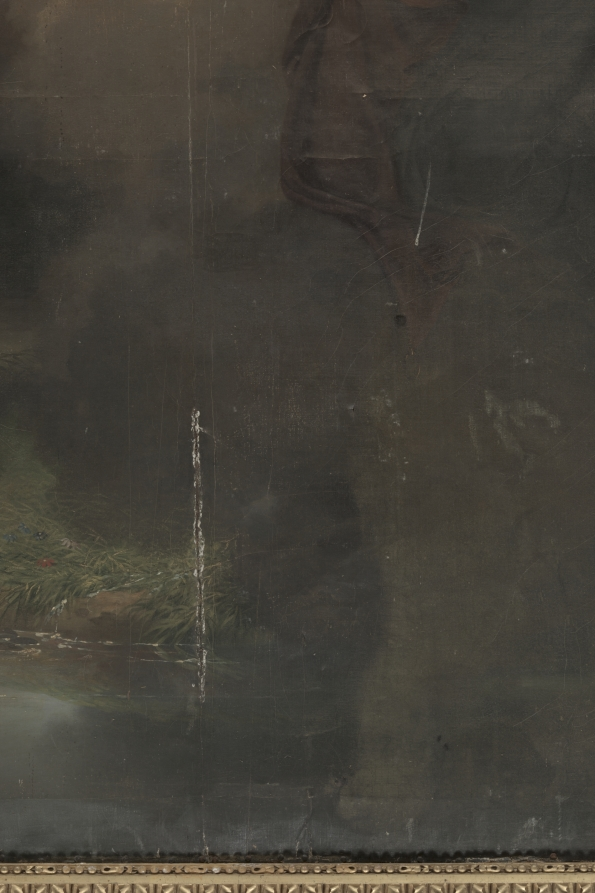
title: Apollo, God of Light, Eloquence, Poetry, and the Fine Arts with Urania, Muse of Astronomy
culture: France, late 18th century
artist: Charles Meynier (French, 1768–1832)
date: 1798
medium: oil on canvas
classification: Painting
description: A recipient of the Grand Prix de Rome in 1789, Charles Meynier became a member of the Académie des Beaux-Arts in 1815 and painted large ceiling decorations at the Louvre and numerous pictures glorifying the Napoleonic legend. Erato, Muse of Lyrical Poetry belongs to a cycle of five paintings executed to fulfill a commission from businessman François Boyer-Fonfréde. They were intended to decorate his home in his native Toulouse and constitute a rare instance of a complete cycle of major paintings that remain intact rather than being split up and separately dispersed.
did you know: Urania leans on a starry orb, indicating her role as the muse of astronomy.